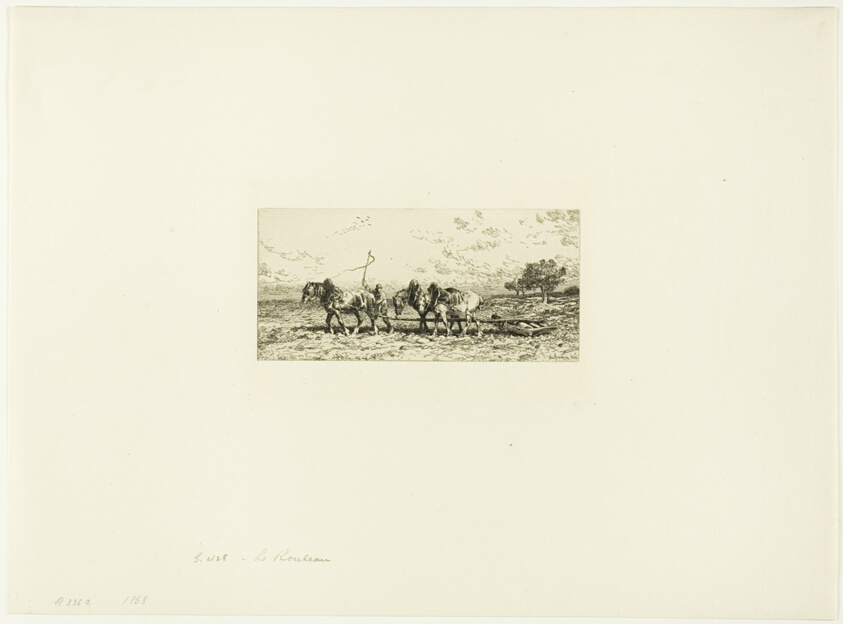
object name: Print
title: The Roller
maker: Charles Émile Jacque (French, 1813-1894)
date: 1868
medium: Etching and plate tone on ivory laid paper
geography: France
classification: etching; print; prints and drawing